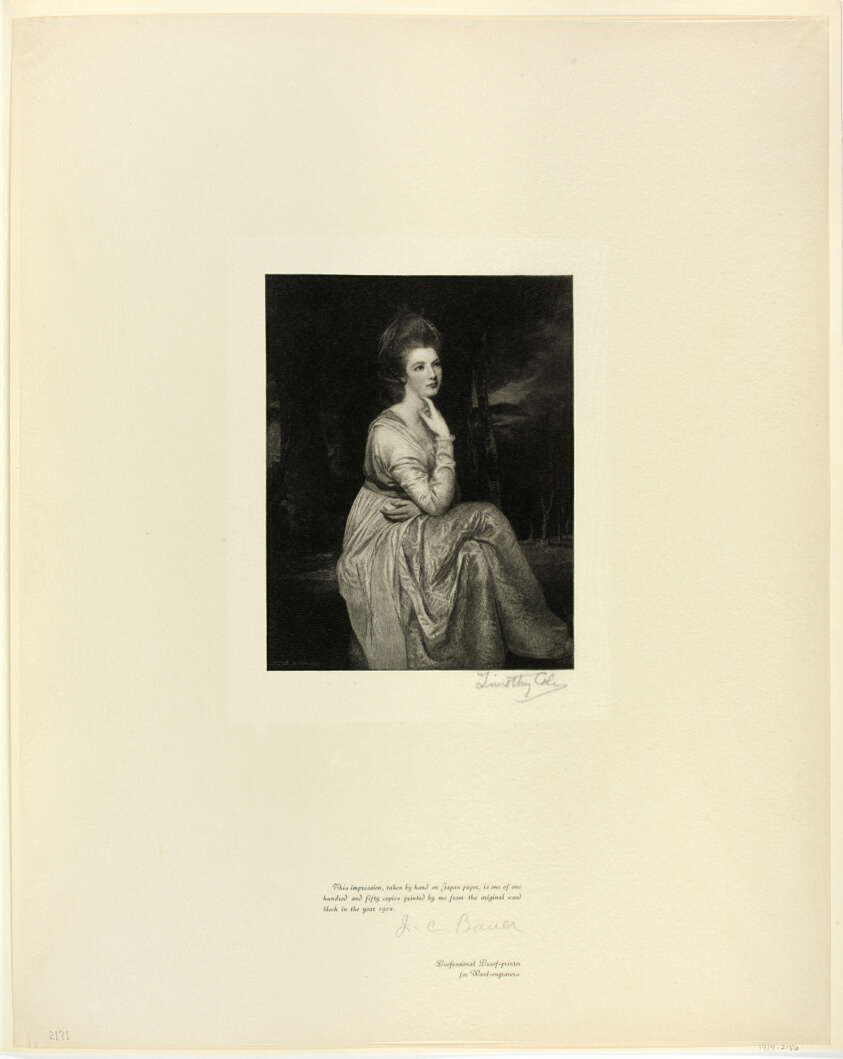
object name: Print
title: Lady Derby, from Old English Masters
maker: Timothy Cole (American, born England, 1852-1931); after George Romney (English, 1734-1802)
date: 1898, printed 1902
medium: Wood engraving on chine paper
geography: United States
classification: wood engraving; print; prints and drawing